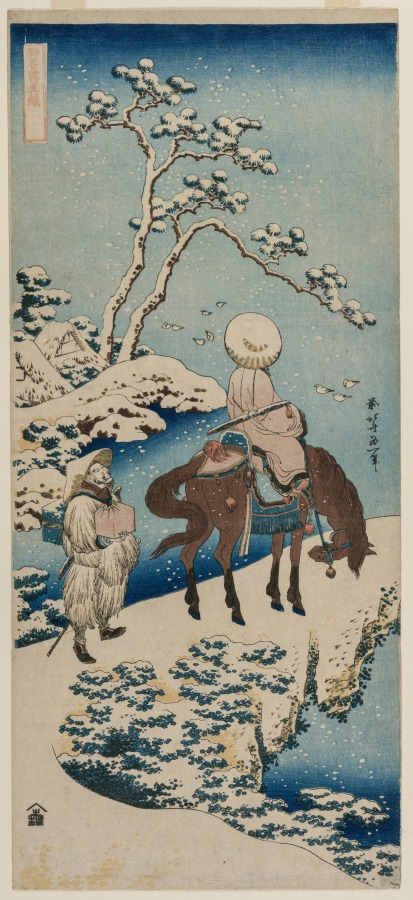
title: Chinese Official Pausing on a Bridge to View the Snow (from the series A True Mirror of Chinese and Japanese Verse)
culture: Japan, Edo period (1615–1868)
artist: Katsushika Hokusai (Japanese, 1760–1849)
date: 1834–5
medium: color woodblock print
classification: Print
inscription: Signature: Zen Hokusai Iitsu hitsu Publisher: Moriya Jisuke (emblem)